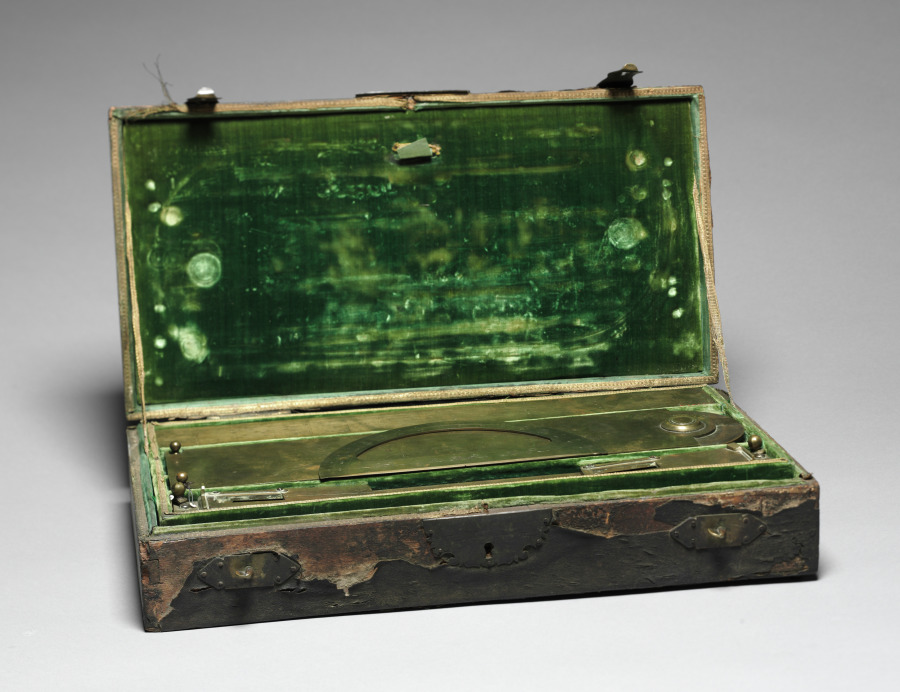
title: Box of Architectural Instruments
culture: France, Paris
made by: Pre. Le Maire (French)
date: 1753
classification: Tool